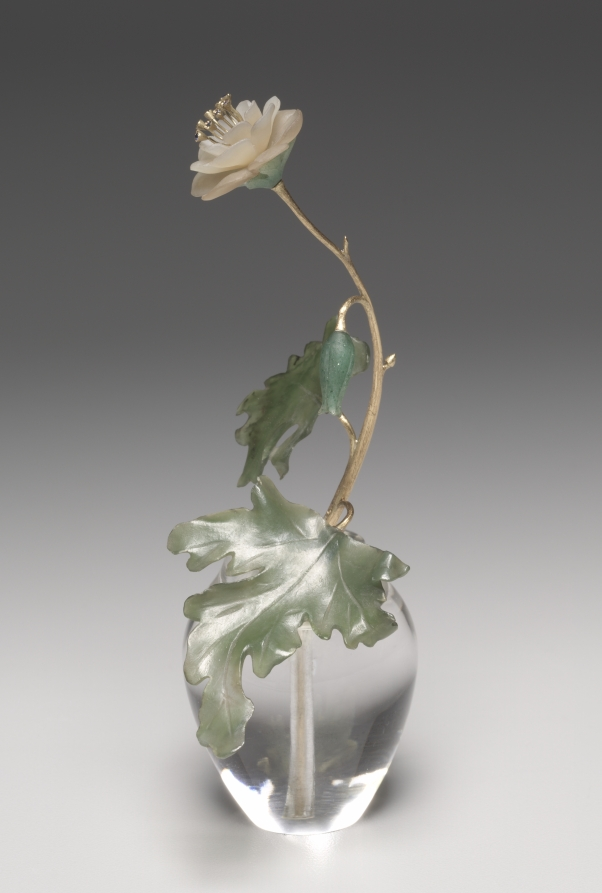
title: Flower Study of an Anemone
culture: Russia, St. Petersburg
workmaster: Henrik Wigström (Russian, 1862–1923)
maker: House of Fabergé (Russian, 1842–1918)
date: c. 1905–15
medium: mat white stone, gold, sapphires, jade, rock crystal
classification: Miscellaneous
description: This flower study depicts a wild anemone in bloom. Fabergé’s inspiration for his flower studies is said to have come from the floral brooches of precious stones that were made in the 1700s for Catherine the Great as well as from the Japanese art of flower arranging, known as ikebana. Small and delicate, Fabergé’s flower studies were given as intimate gifts to friends by the tsarina and others in the court. She also liked to take them around to wherever the imperial family was residing as a reminder of spring during the harsh Russian winters.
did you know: The stems of Fabergé’s flower studies are set into little basins carved from rock crystal to resemble pots of water.